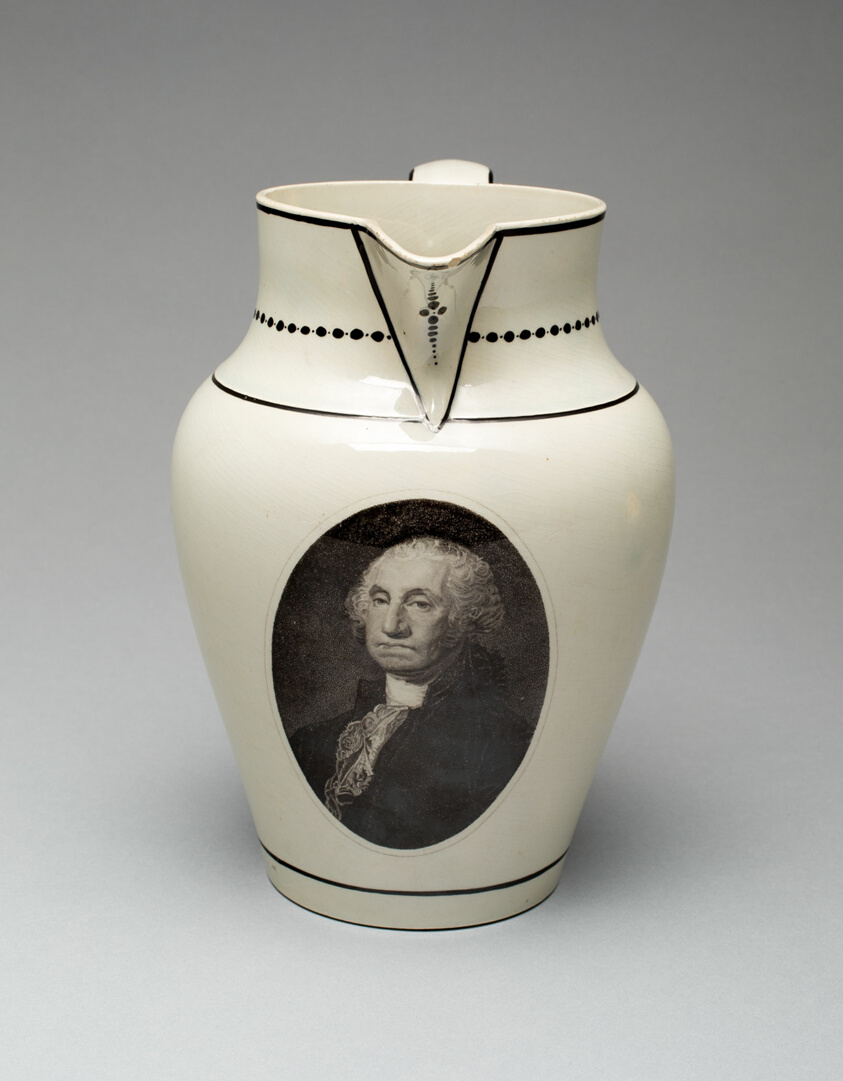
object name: Decorative Arts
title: Jug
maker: Herculaneum Pottery; English, 1796–1840; Made for the American market; Liverpool, England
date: 1800–10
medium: Creamware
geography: Liverpool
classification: vessel; earthenware; american decorative arts; european decorative arts; ceramics; decorative arts